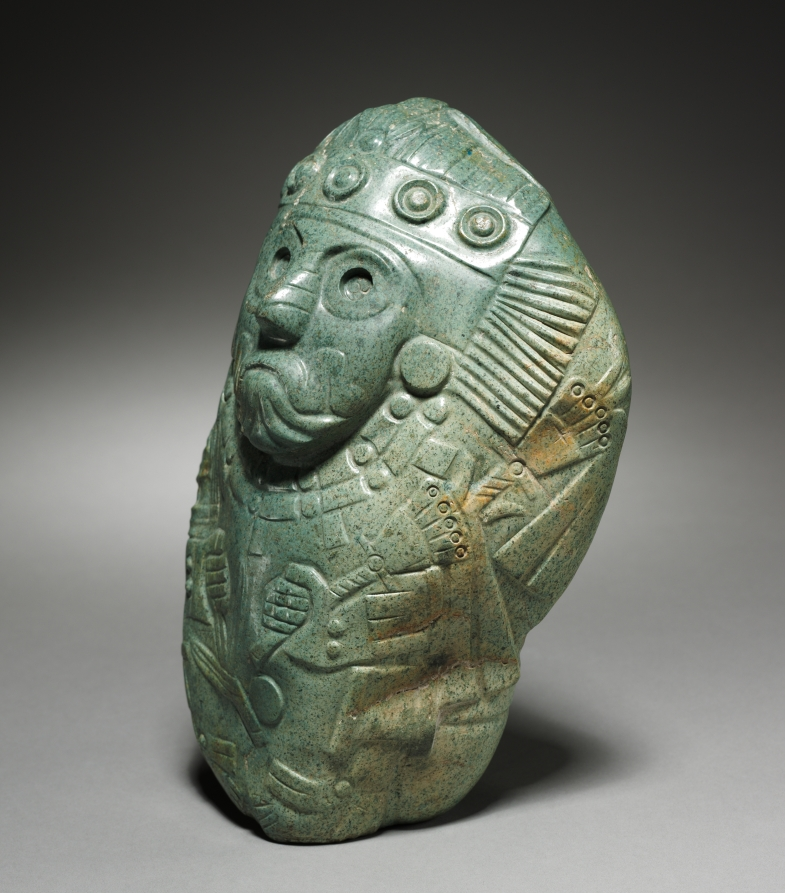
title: Tlaloc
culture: Central Mexico, Aztec, 13th-16th century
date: c. 1200–1519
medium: stone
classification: Sculpture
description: A natural cobble of greenstone has been smoothed and carved in low relief to portray the Aztec rain god Tlaloc, recognizable by his ringed eyes, twisted nose element, and fanged mouth. As the provider of water, Tlaloc is a patron of agriculture and holds a stalk of maize in one hand. To the Aztecs, Tlaloc was an ancient and civilized god; his worship could be traced back to the ancient ruined site Teotihuacan.